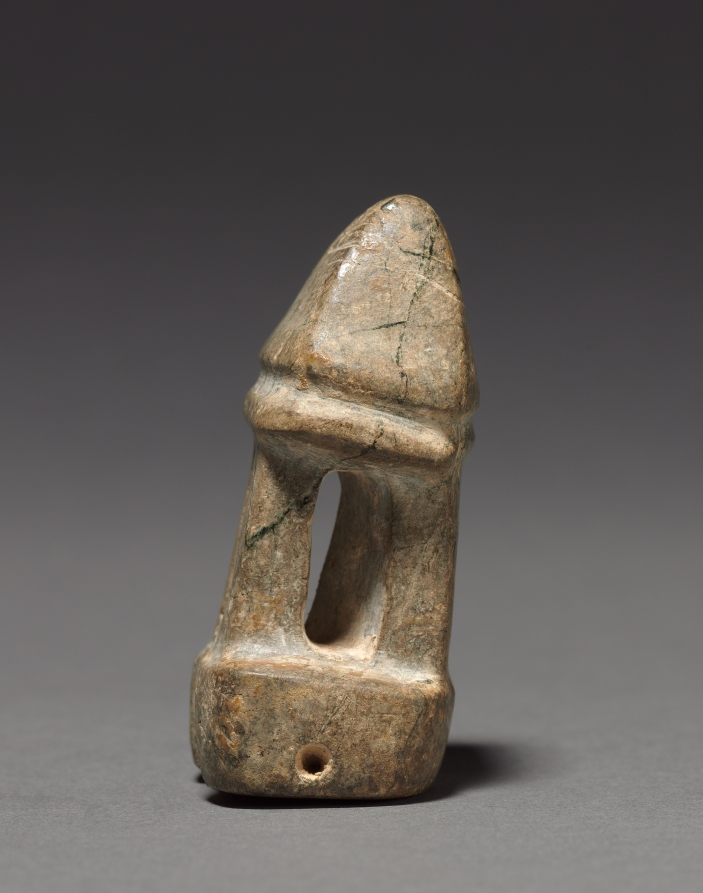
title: Architectural Model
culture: Mesoamerica, Mexico, Guerrero, Mezcala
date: 100 BCE–300 CE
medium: serpentine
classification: Sculpture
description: The Mezcala style takes its name from a river in its homeland, the Guerrero region of western Mexico. The style is known for small-scale stone sculptures including architectural “models” characterized by sleek abstraction. Because comparisons to actual architecture in the Mezcala region are scarce, it is not known whether the models refer to temples, houses, or underground funerary structures.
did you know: The Mezcala style is only identified in stone sculpture.